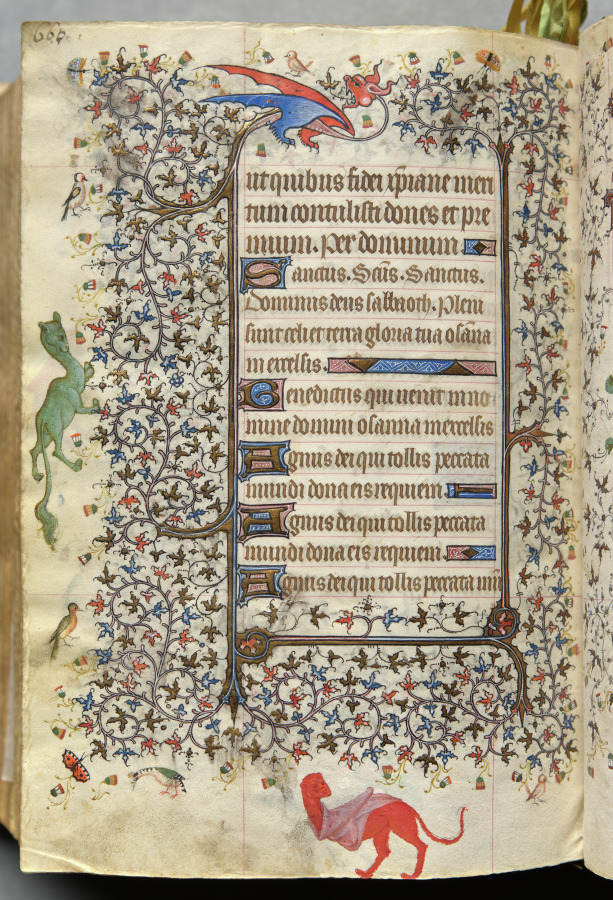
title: Hours of Charles the Noble, King of Navarre (1361-1425), fol. 324v, Text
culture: France, Paris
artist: Master of the Brussels Initials and Associates (French)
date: c. 1405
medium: ink, tempera, and gold on vellum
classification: Bound Volume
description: This precious volume was obviously highly prized by its owner, the French-born King of Navarre, who had his coat of arms painted on no less than twenty folios. Rather than directly commissioning this manuscript from a specific workshop, it seems that Charles the Noble acquired his book of hours -- perhaps ready-made for the luxury market -- while on a trip to Paris in 1404-05. A collaborative effort, six painting styles are evidenced within the pages of this codex, those of two Italians, two Frenchmen, and two Netherlanders. The painter who was responsible for the planning and decoration of the book, and who produced seventeen of the large miniatures, was a Bolognese artist known as the Master of the Brussels Initials. His principal assistant, responsible for most of the borders, was a Florentine who signed his name "Zecho" da Firenze on folio 208 verso.